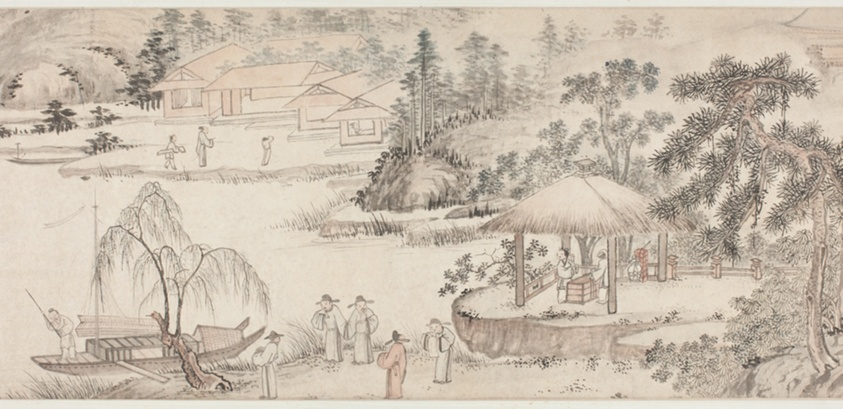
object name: Painting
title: Parting at the Gate of the Capital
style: Chinese (culture or style)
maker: Yao Shou (Chinese, 1423-1495)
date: Ming dynasty (1369–1644), 15th century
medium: Handscroll; ink and color on paper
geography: China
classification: handscroll; painting; asian art